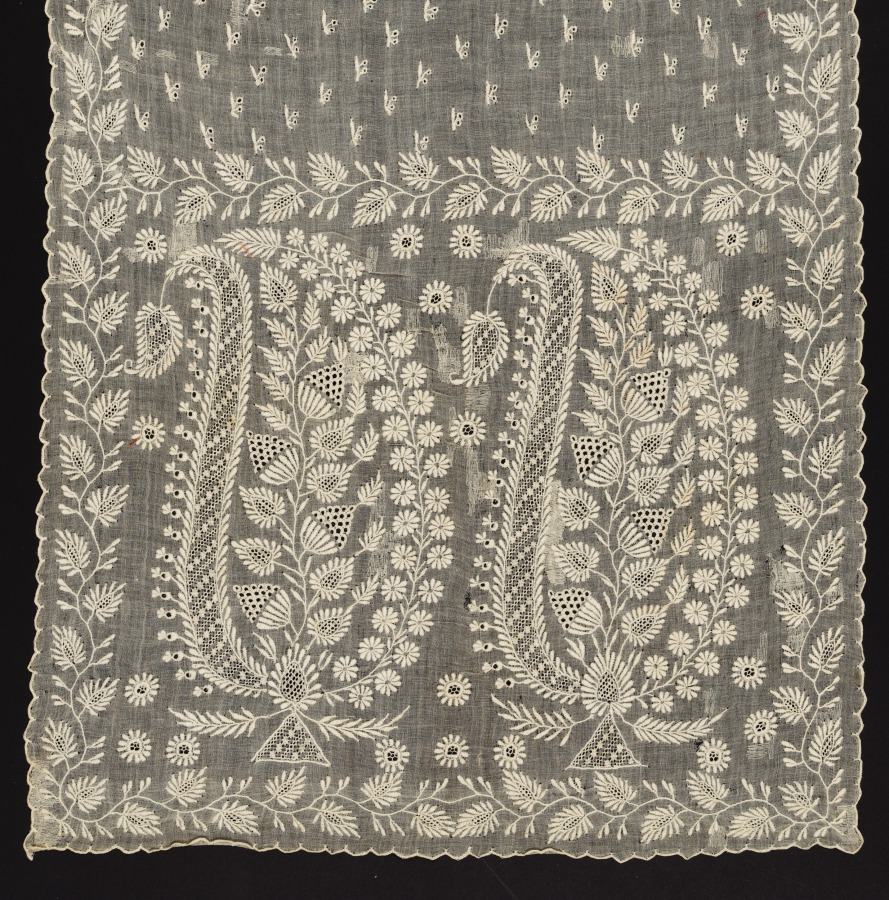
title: Head Veil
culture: India, Lucknow, late 1800s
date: late 1800s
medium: Cotton: needle lace (drawnwork) and embroidery (chikan)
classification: Embroidery